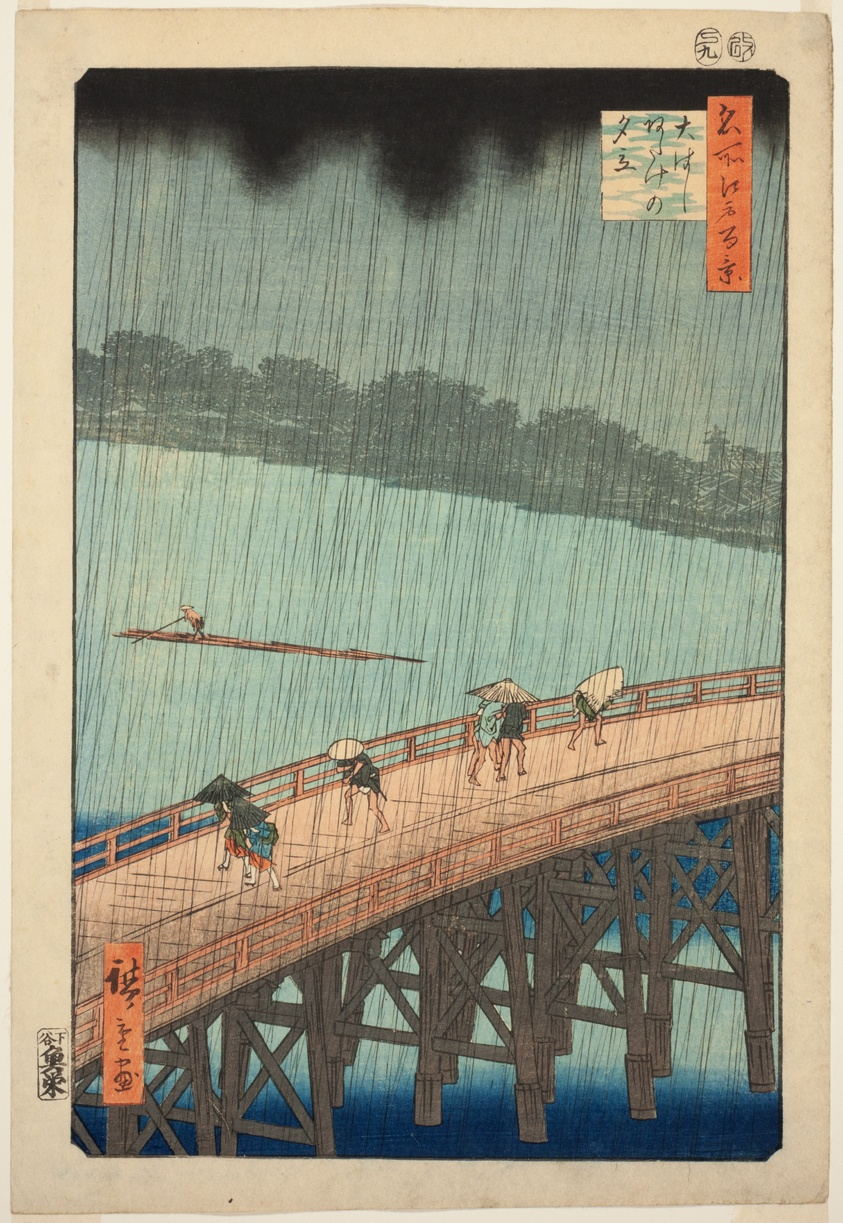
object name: Print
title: Sudden Shower over Shin Ohashi Bridge and Atake (Ohashi Atake no yudachi), from the series "One Hundred Famous Views of Edo (Meisho Edo hyakkei)"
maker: Utagawa Hiroshige 歌川 広重; Japanese, 1797-1858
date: 1857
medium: Color woodblock print; oban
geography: Japan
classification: woodblock print; print; asian art